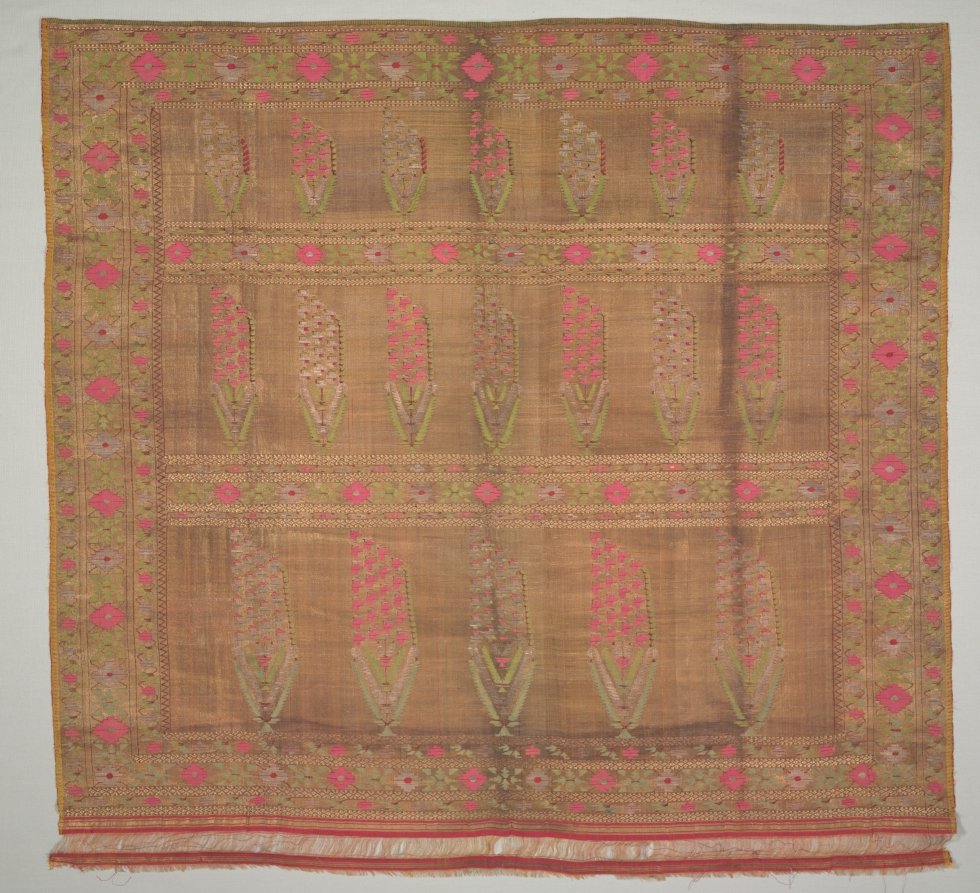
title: Fragment of a Sari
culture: India, Aurangabad ?, 18th-19th century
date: 1700s - 1800s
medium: brocade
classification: Textile